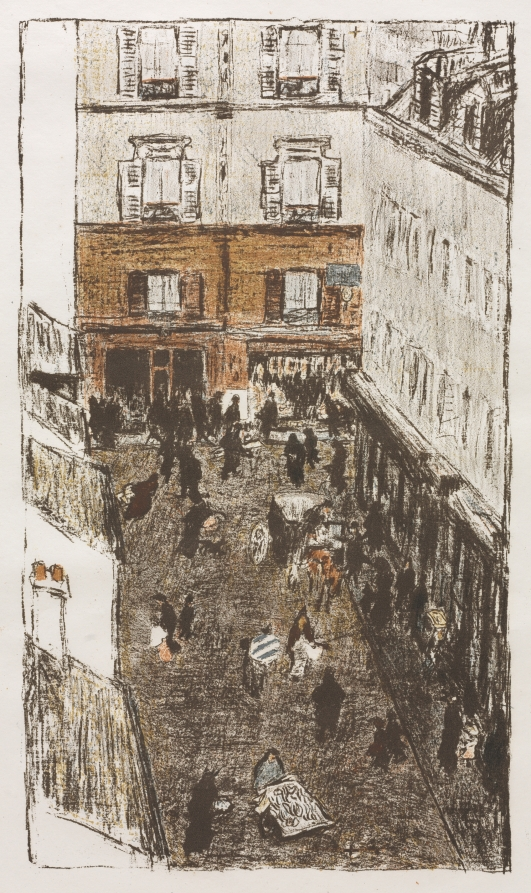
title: Street Corner Seen from Above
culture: France, 19th century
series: Some Scenes of Parisian Life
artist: Pierre Bonnard (French, 1867–1947)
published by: Published by Ambroise Vollard; Printed by Auguste Clot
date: 1899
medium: lithograph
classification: Print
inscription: numbered, lower right, in graphite: no 99 signed, lower right, in graphite: PB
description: This suite of color lithographs collected Pierre Bonnard’s observations of city life, ranging from animated street scenes to distant observations glimpsed from the artist’s Montmartre studio window. Rather than memorializing the famous monuments of Paris, Bonnard preferred to depict small neighborhood scenes populated by urbanites shopping and strolling and by vendors selling their wares. The setting for one of the prints is the second-largest public park in Paris, the Bois de Boulogne, which was a popular place for families to relax, stroll, and enjoy carriage rides around the lakes. Two prints are nocturnal scenes in which gaslight emanating from shop windows is reflected on the wet streets, creating passages of bright yellow in the otherwise dark compositions. Bonnard’s favorite subjects, such as the Parisienne—a young, fashionable, modern woman—as well as children and dogs, appear repeatedly throughout the prints in the suite.